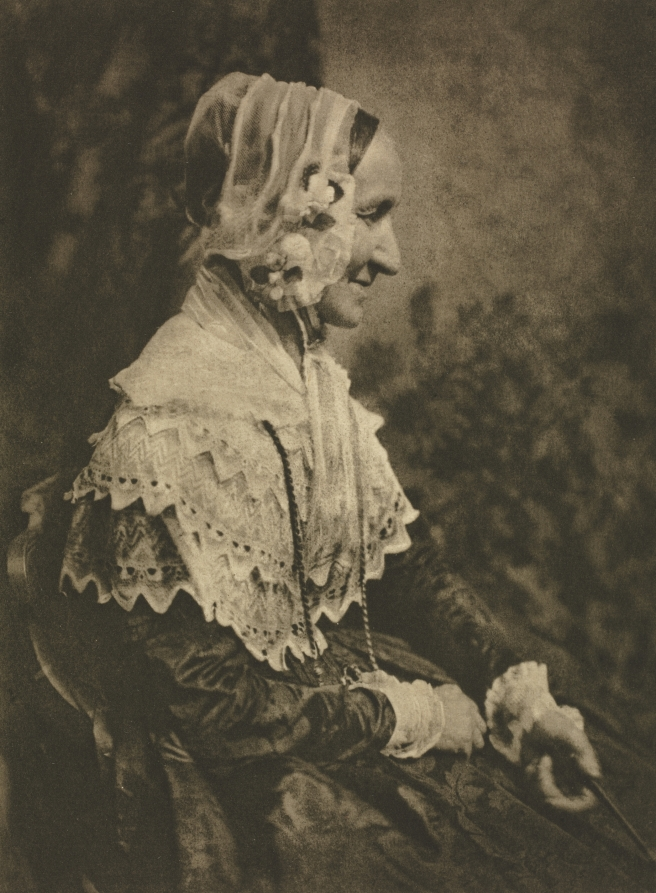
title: Camera Work: Mrs. Rigby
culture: England, 20th century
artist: David Octavius Hill (British, 1802–1870)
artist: and Robert Adamson (British, 1821–1848)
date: 1905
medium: photogravure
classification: Bound Volume